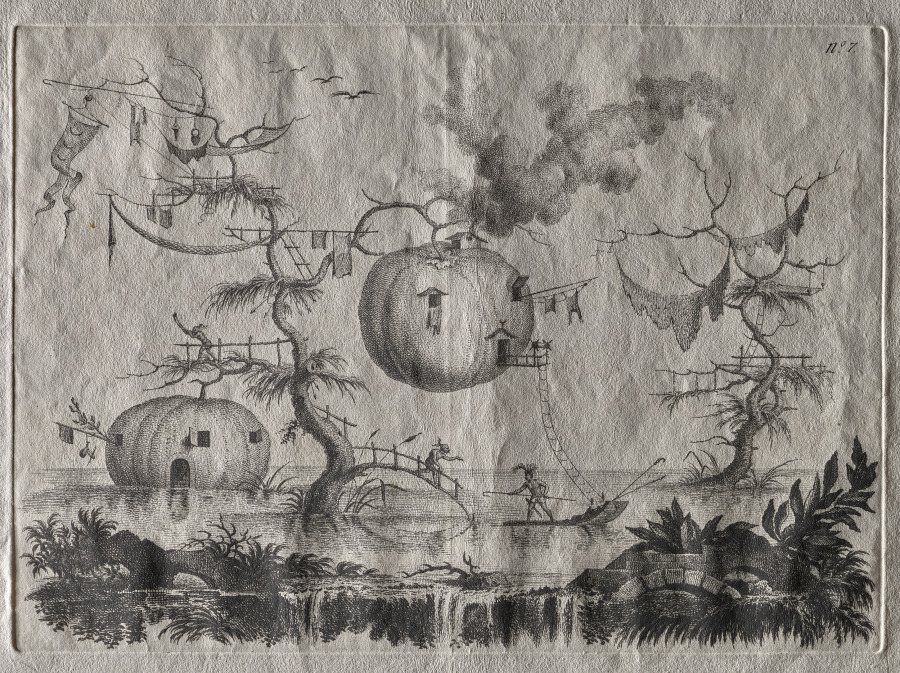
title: Pumpkins Used as Dwellings to Be Secure against Wild Beasts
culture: Italy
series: Suite of the Most Notable Things Seen by John Wilkins Erudite English Bishop during His Famous Voyage from the Earth to the Moon … dedicated to Sir William Hamilton ambassador to the Court of Naples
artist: Filippo Morghen (Italian, 1730–after 1807)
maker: possibly after Jean-Pierre-Louis-Laurent Hoüel (French, 1735–1813)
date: about 1769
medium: etching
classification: Print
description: Filippo Morghen’s set of 10 etchings is outstanding among visual narratives of imaginary voyages to the moon, both visual and literary, that intrigued 18th-century European audiences. A title page and nine plates depict the imagined lives and economy of moon dwellers. These include modes of transport such as large birds and sailboats propelled by giant bellows, enormous scissors for capturing wild beasts (including an oversized rat), and the use of giant pumpkins as fishing boats and as dwellings. Representations of the moon dwellers are based on inaccurate and imaginary European interpretations of Asian, Ottoman, and Native American cultures—called chinoiserie and turquerie—that permeated the decorative and visual arts of the period.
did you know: Morghen based this print series on three books dedicated to moon exploration, including Bishop Francis Godwin’s The Man in the Moone (1640).